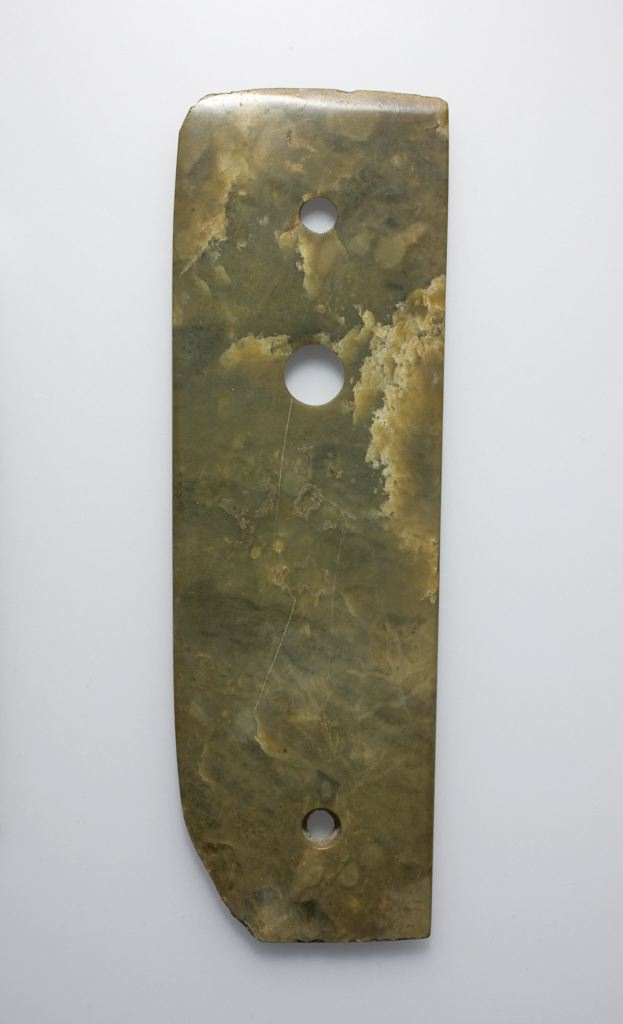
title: Blade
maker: China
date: Late Neolithic (3000BCE-2000BCE)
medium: Jade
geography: China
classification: jade; asian art